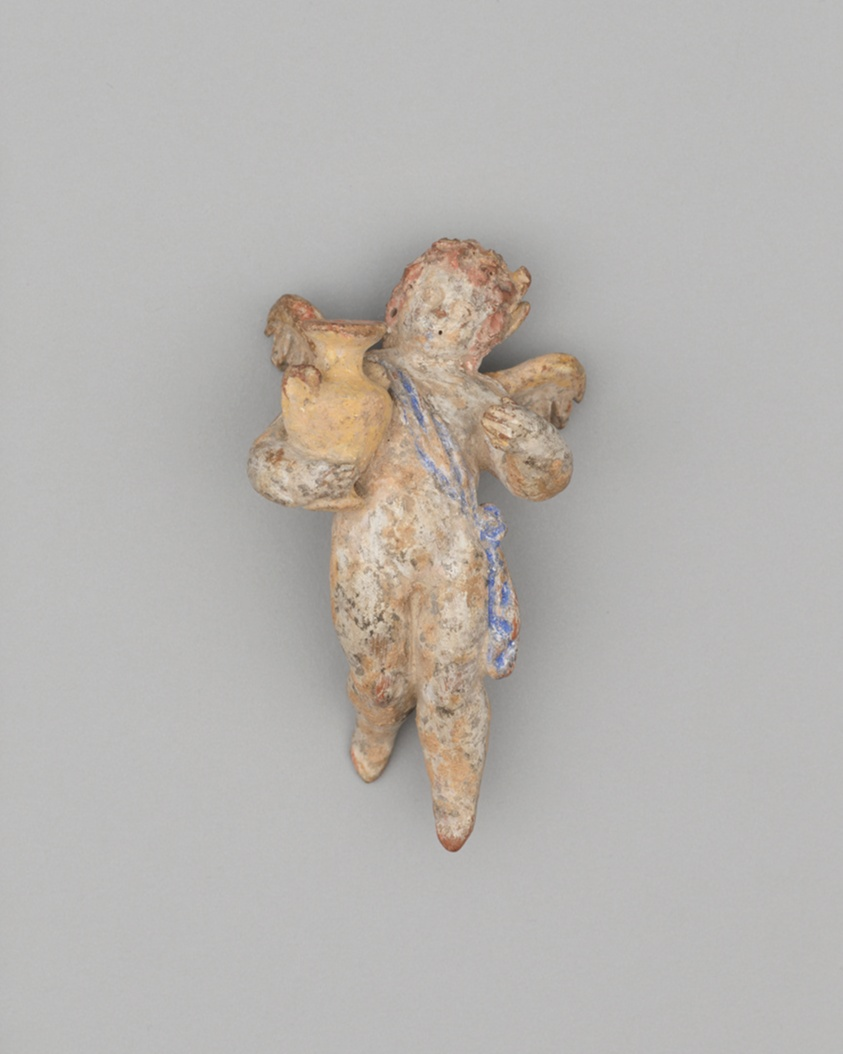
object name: Sculpture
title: Statuette of Eros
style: greek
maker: Greek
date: 3rd/2nd century BCE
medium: terracotta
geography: Greece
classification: earthenware; ceramics; sculpture; ancient art